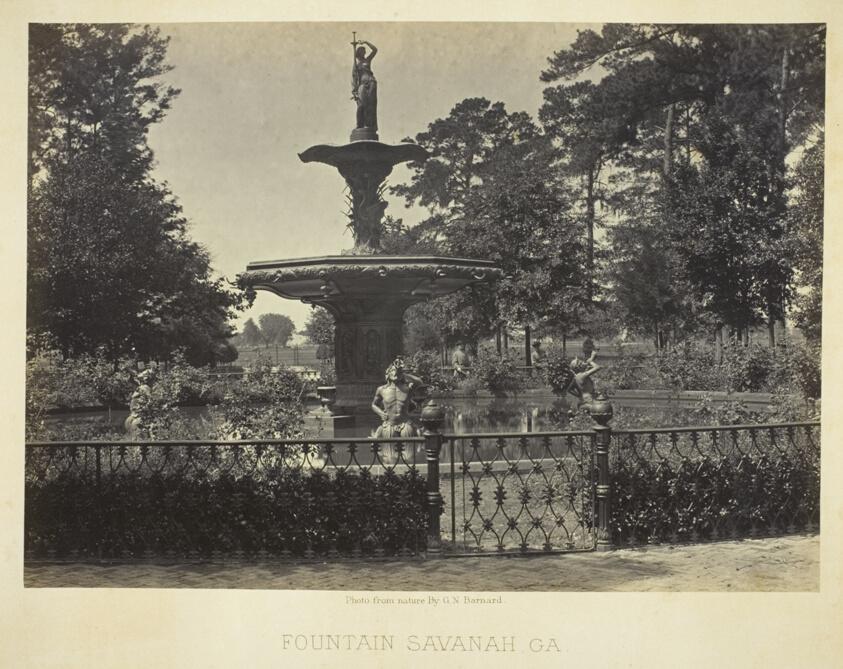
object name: Photograph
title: Fountain, Savannah, GA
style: 19th century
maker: George N. Barnard (American, 1819–1902)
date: 1866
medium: Albumen print, plate 51 from the album "Photographic Views of the Sherman Campaign" (1866)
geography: United States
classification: albumen silver print; photographic process; photography; photograph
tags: Collected by Hugh Edwards, Sherman's Campaign 1866